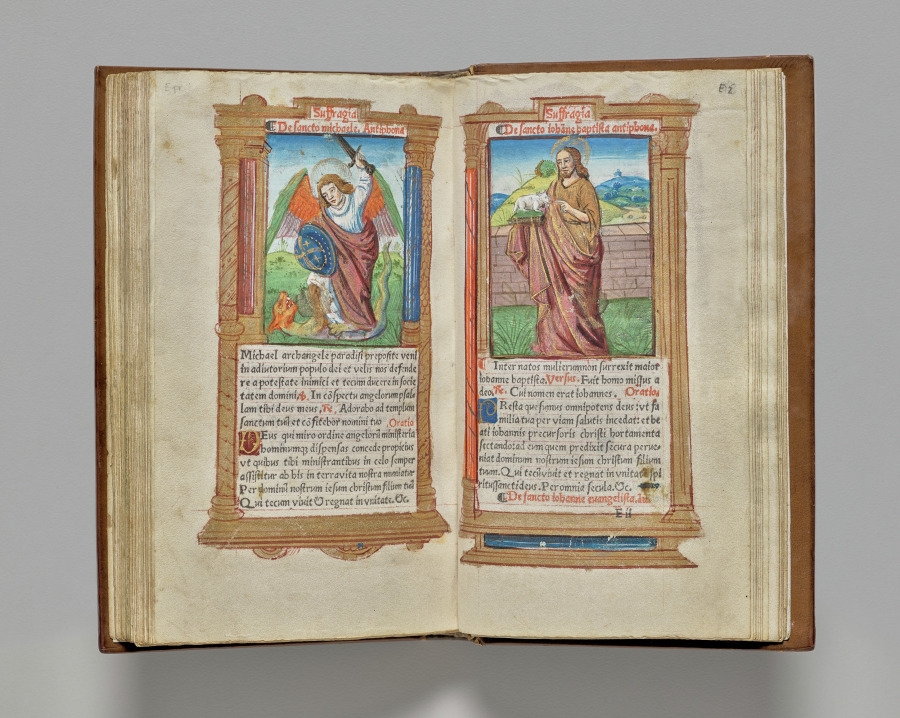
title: Printed Book of Hours (Use of Rome): fol. 97v, St. Michael the Archangel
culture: France, Paris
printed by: Guillaume Le Rouge (French, Paris, active 1493–1517)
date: 1510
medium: 112 Printed folios on parchment, bound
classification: Bound Volume